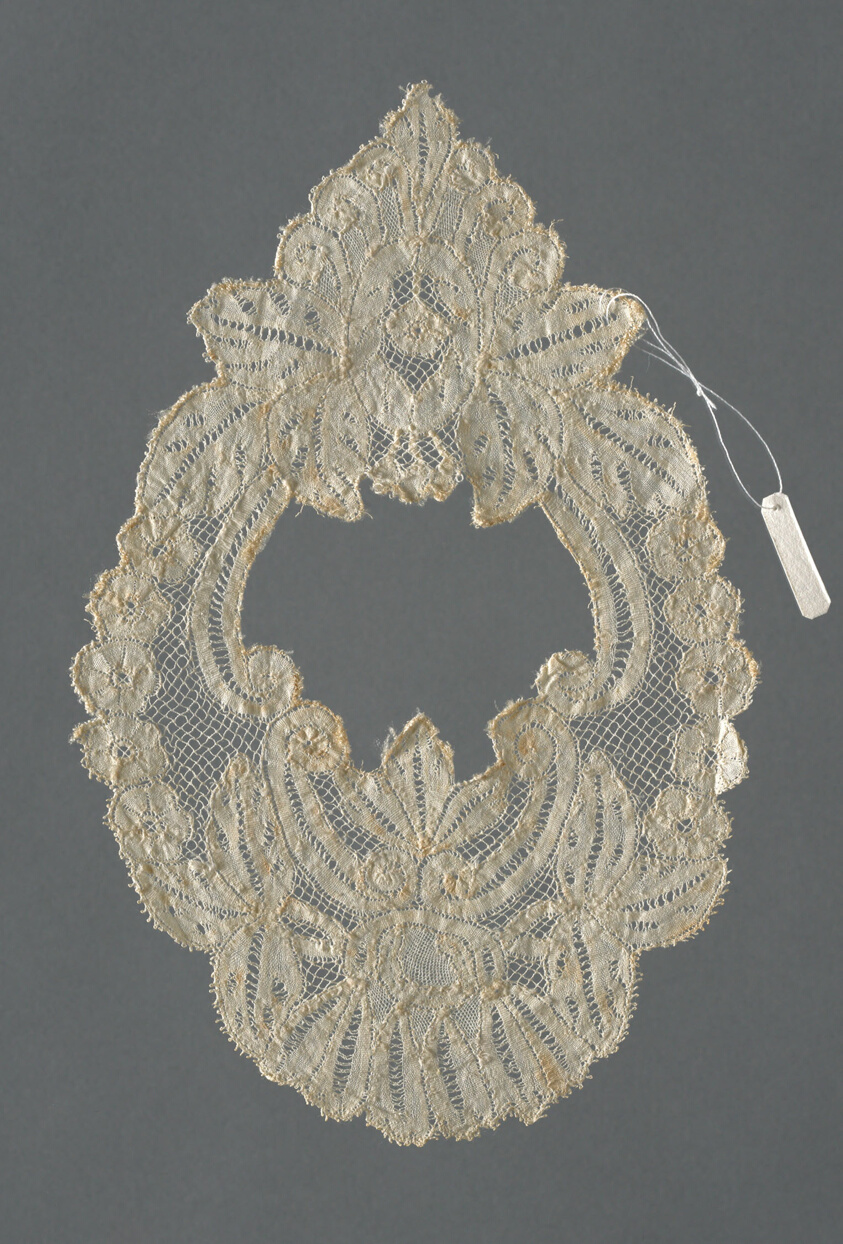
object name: Textile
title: Medallion Insert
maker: Belgium, Possibly Ghent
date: 1850/75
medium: Cotton, bobbin part lace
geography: Belgium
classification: textile; lace - bobbin